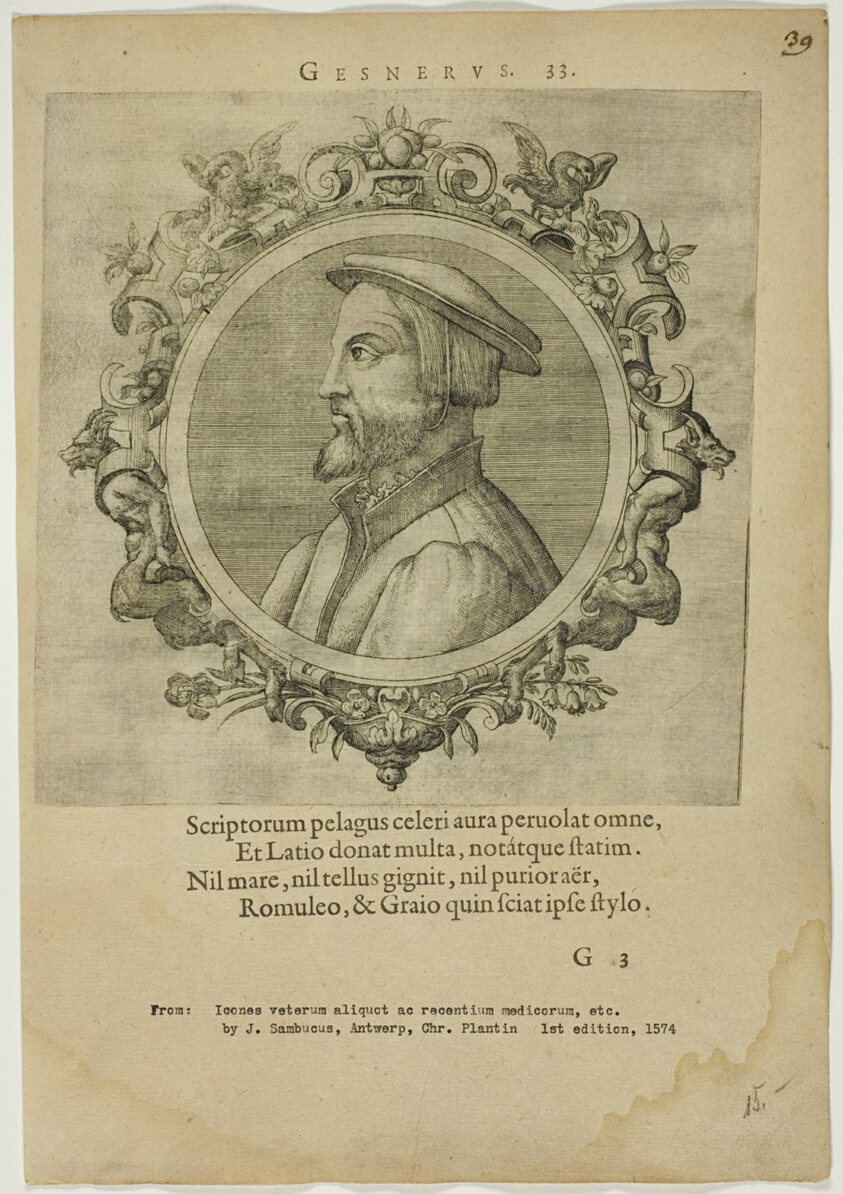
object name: Print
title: Portrait of Gesnerus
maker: Unknown Artist (Flemish); written by Johannes Sambucus (Flemish, 1531-1584)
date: published 1574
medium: Etching, with engraving, on cream laid paper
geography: Flanders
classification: etching; print; prints and drawing